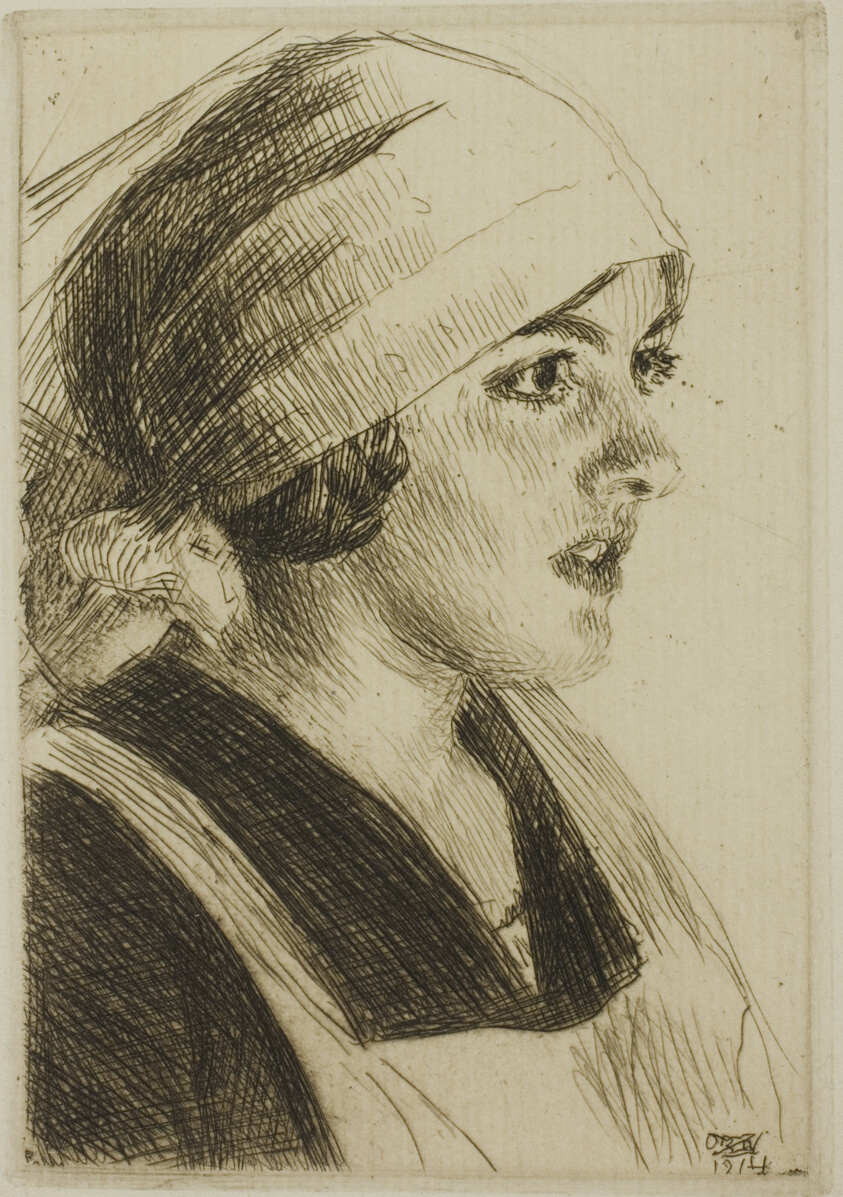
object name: Print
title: Gulli I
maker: Anders Zorn (Swedish, 1860-1920)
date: 1914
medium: Etching on ivory laid paper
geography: Sweden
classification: etching; print; prints and drawing